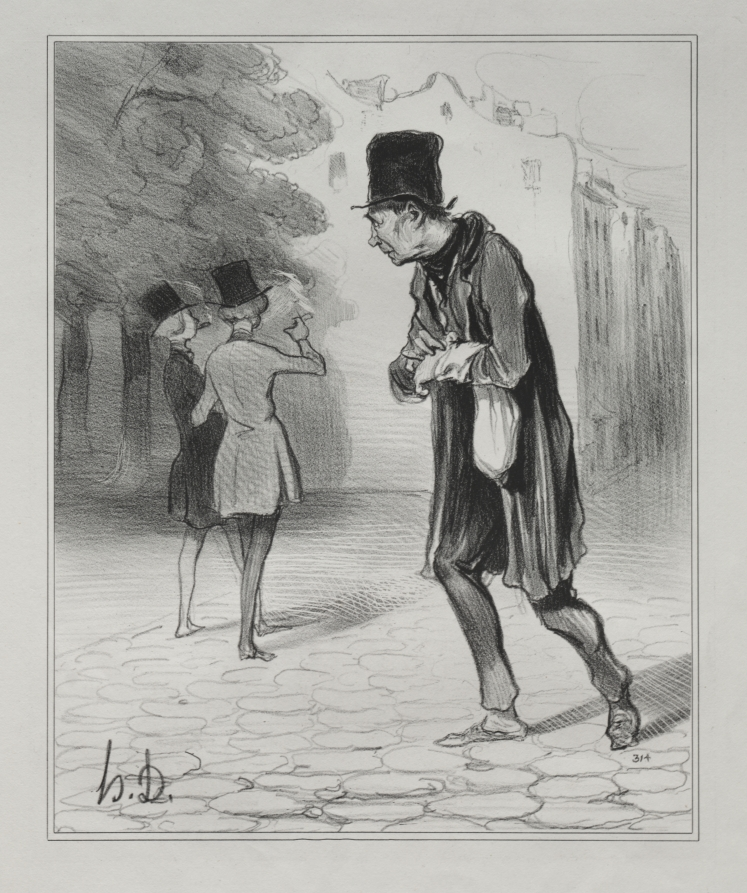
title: The Collector of Cigar Stubs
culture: France, 19th century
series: The Bohemians of Paris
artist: Honoré Daumier (French, 1808–1879)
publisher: Aubert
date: 1841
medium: lithograph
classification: Print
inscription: Upper margin, pencil: 829 / I / DRR ; Lower margin, pencil: Bohémiens de Paris (Pl. 4)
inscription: Verso, pencil: Le ramasseur de bouts de cigares. / Ils n'en finiront pas ces oiseaux là! c'est des clercs d'huissiers / ça fume jusqu'à la cendre, et pas moyens de leur tirer des carottes. / 5772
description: This print was published in Le Charivari (December 5, 1841) as plate 4 from the series The Bohemians of Paris.